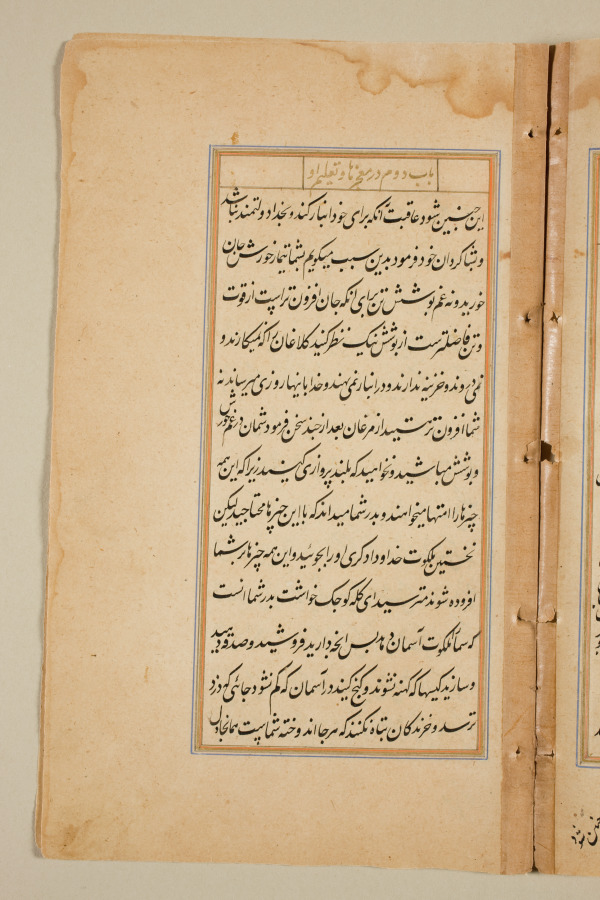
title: Text page from a Mirror of Holiness (Mir’at al-quds) of Father Jerome Xavier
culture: Mughal India, Allahabad, made for Prince Salim (1569–1627)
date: 1602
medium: Ink and gold on paper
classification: Manuscript